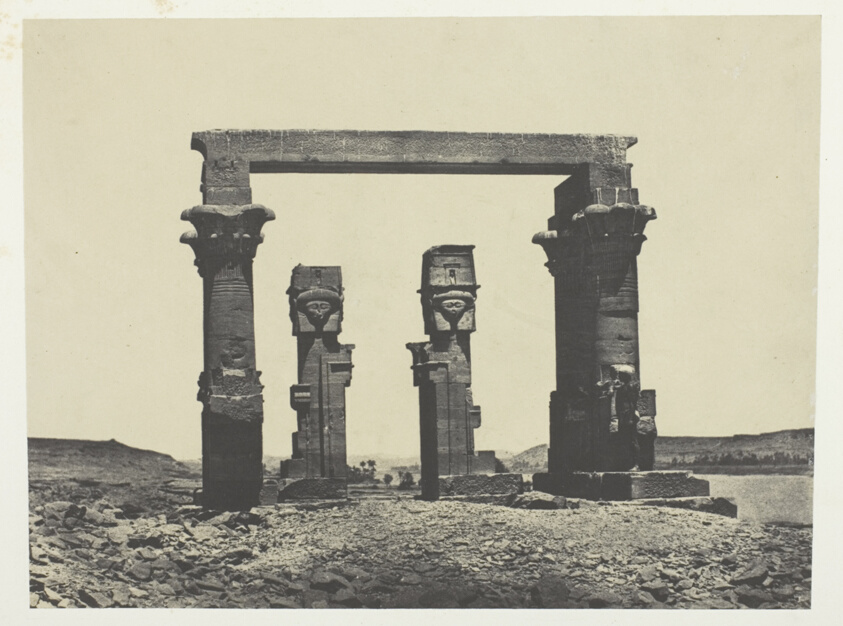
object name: Photograph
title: Temple de Kardassy, Nubie, plate 87 from the album "Egypte, Nubie, Palestine et Syrie" (1852)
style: 19th century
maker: Maxime Du Camp (French, 1822–1894)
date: 1849/51, printed 1852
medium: Salted paper print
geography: France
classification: salted paper print; photographic process; photography; photograph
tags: Collected by Hugh Edwards, Egypte, Nubie, Palestine et Syrie